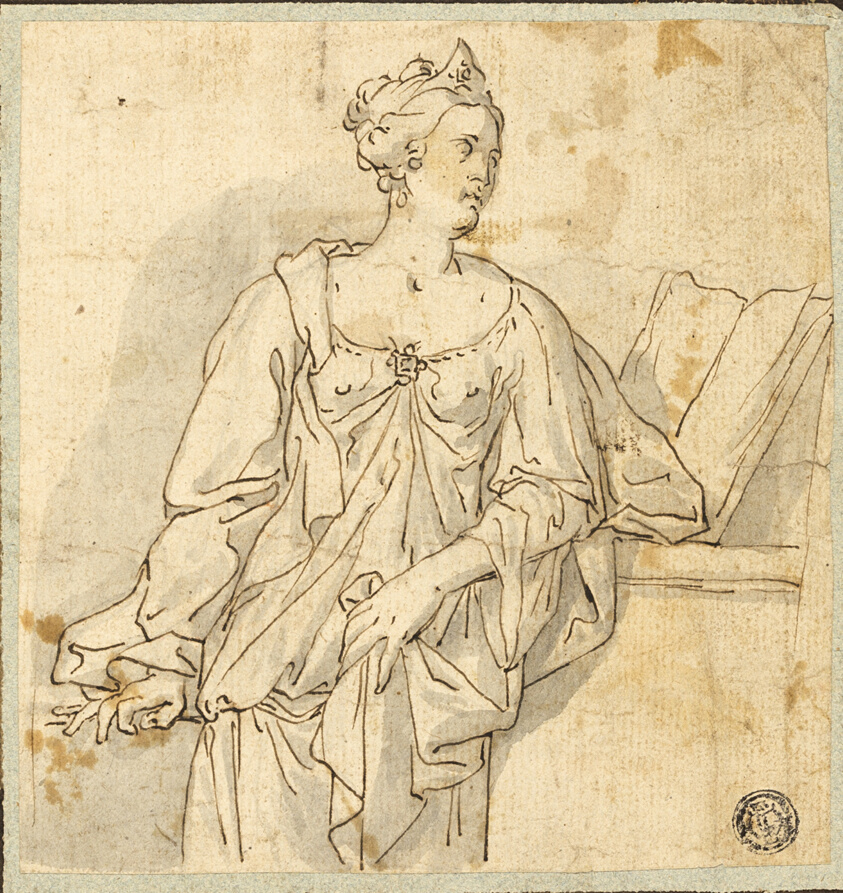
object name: Drawing and Watercolor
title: Cornelia, Mother of the Gracchi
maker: Follower of Francesco Solimena (Italian, 1657-1747)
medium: Pen and brown ink, with brush and gray wash, on cream laid paper, laid down on blue laid paper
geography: Italy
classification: pen and ink drawings; paper; drawings (visual works); prints and drawing